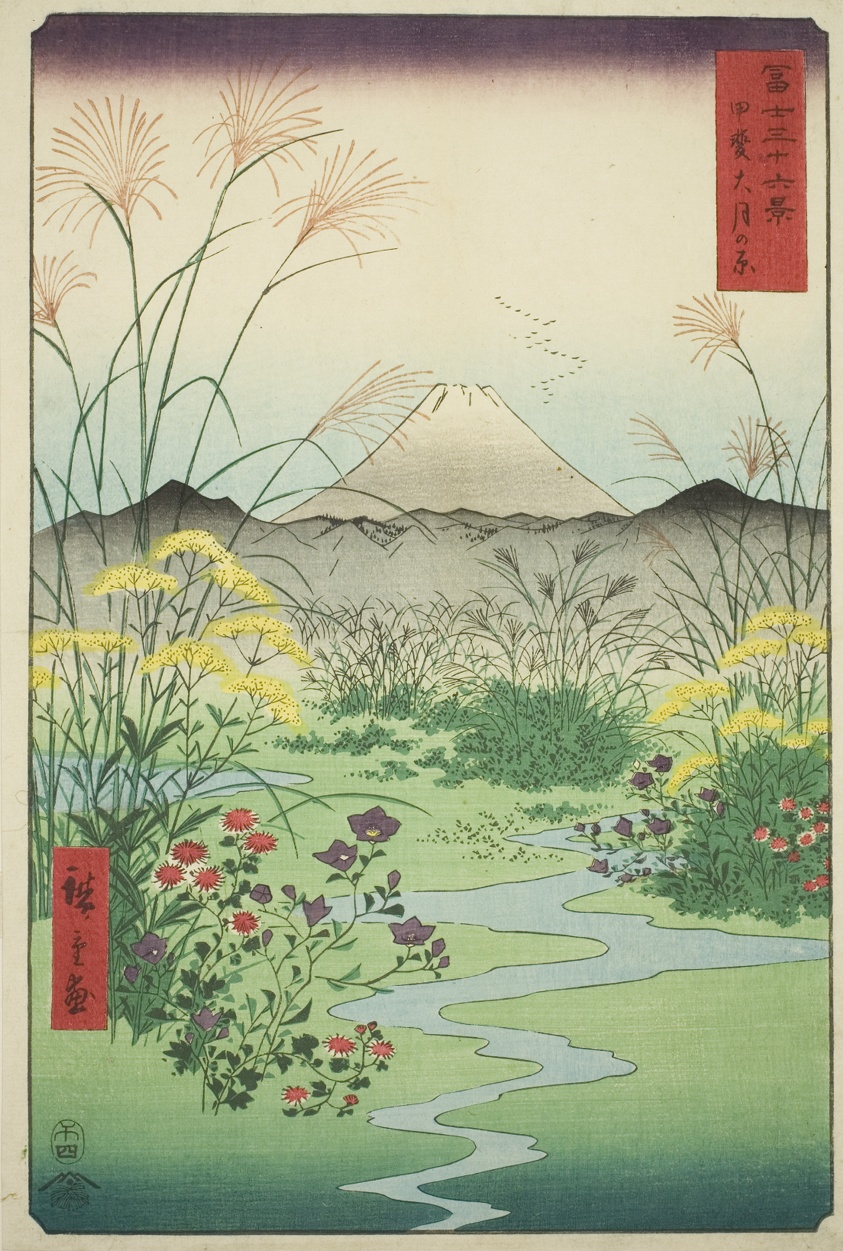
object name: Print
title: Otsuki Plain in Kai Province (Kai Otsuki no hara), from the series "Thirty-six Views of Mount Fuji (Fuji sanjurokkei)"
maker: Utagawa Hiroshige 歌川 広重; Japanese, 1797-1858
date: 1858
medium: Color woodblock print; oban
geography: Japan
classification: woodblock print; print; asian art